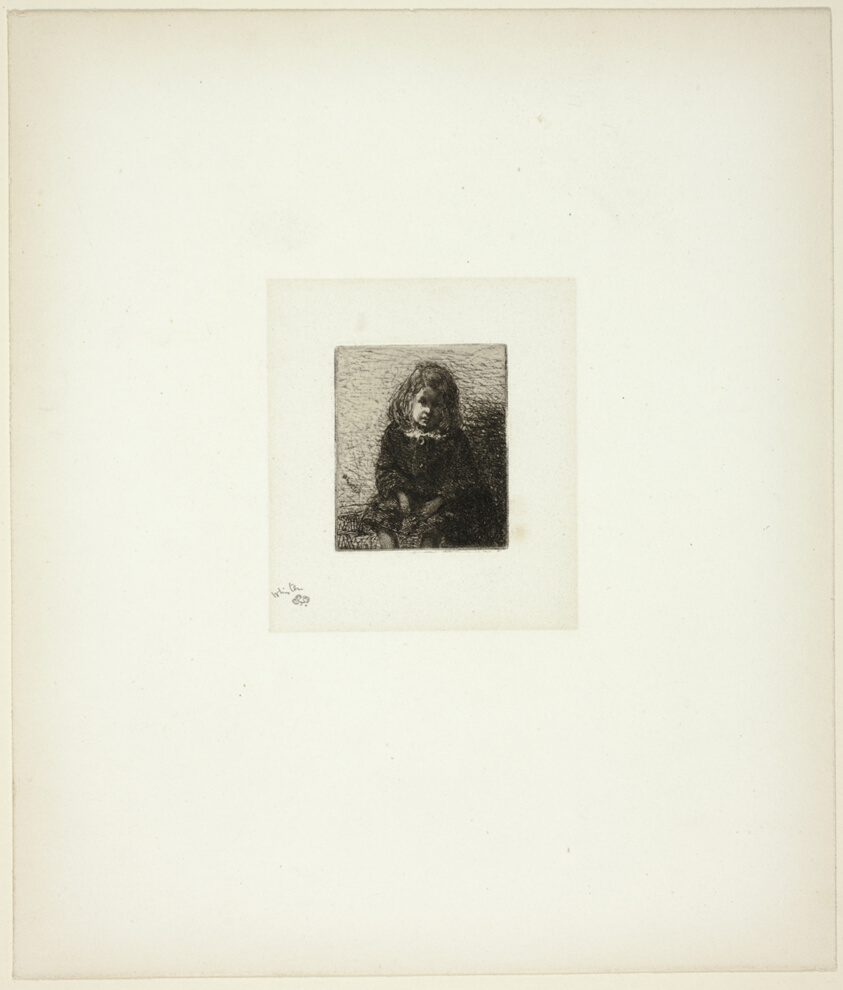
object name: Print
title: Little Arthur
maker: James McNeill Whistler (American, 1834-1903)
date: 1857/58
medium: Etching in black ink on off-white China paper laid down on off-white wove paper (chine collé)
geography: United States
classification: etching; print; prints and drawing; paper